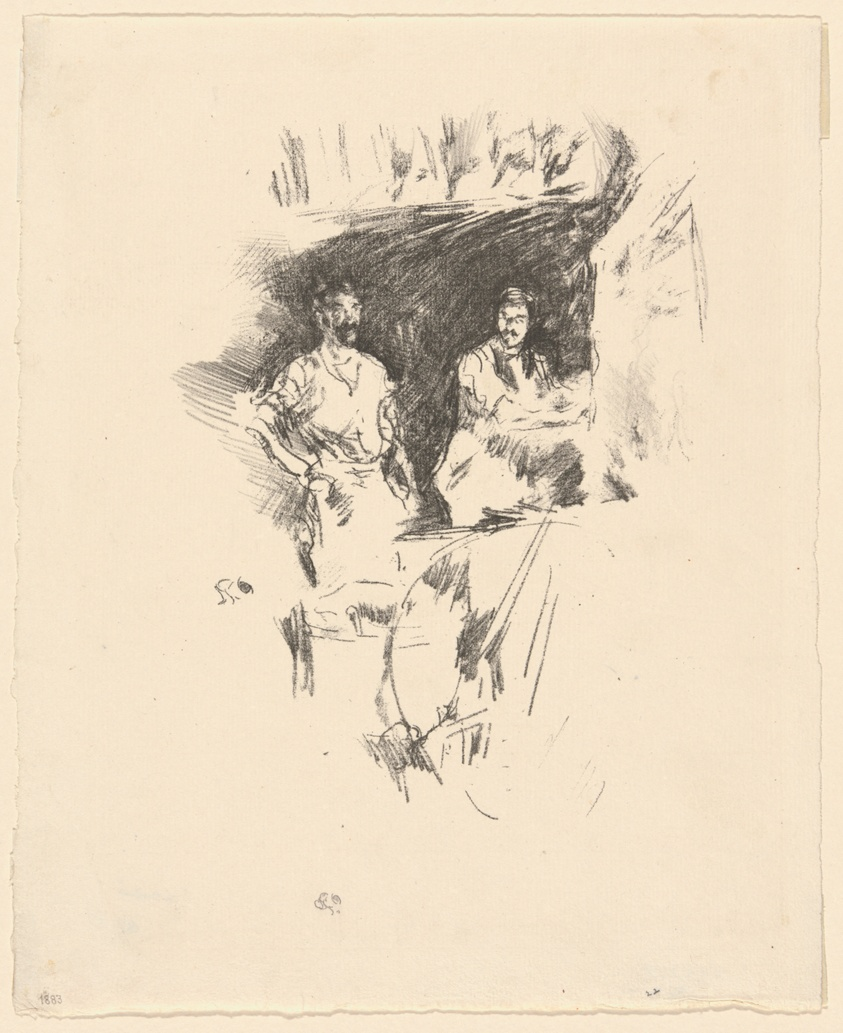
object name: Print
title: The Brothers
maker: James McNeill Whistler (American, 1834-1903)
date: 1895/96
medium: Transfer lithograph in black on cream laid paper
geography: United States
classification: transfer lithograph; lithograph; print; prints and drawing; paper